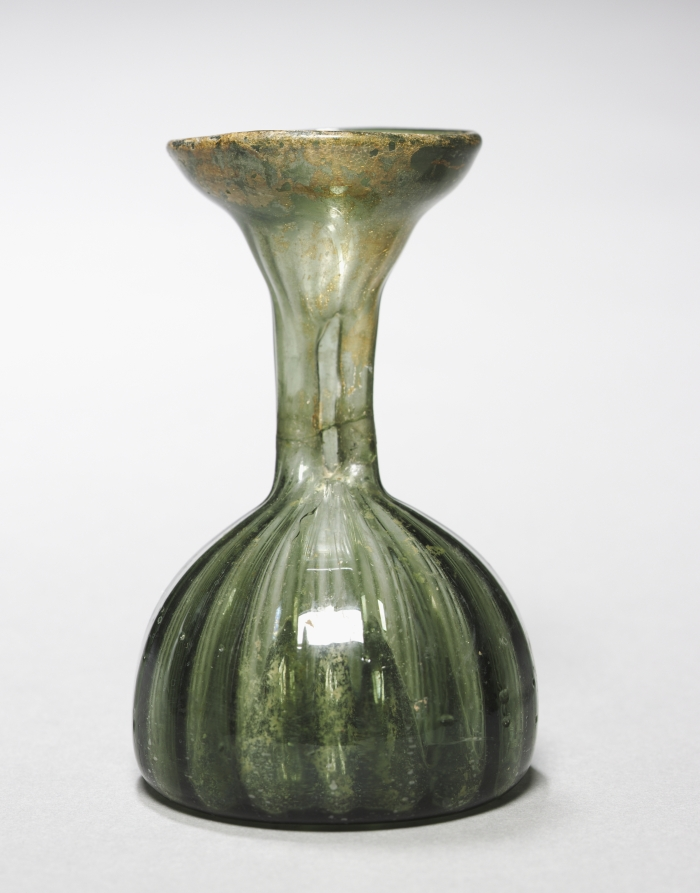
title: Flask (Kuttrolf)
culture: Germany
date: 1400s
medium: green glass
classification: Glass